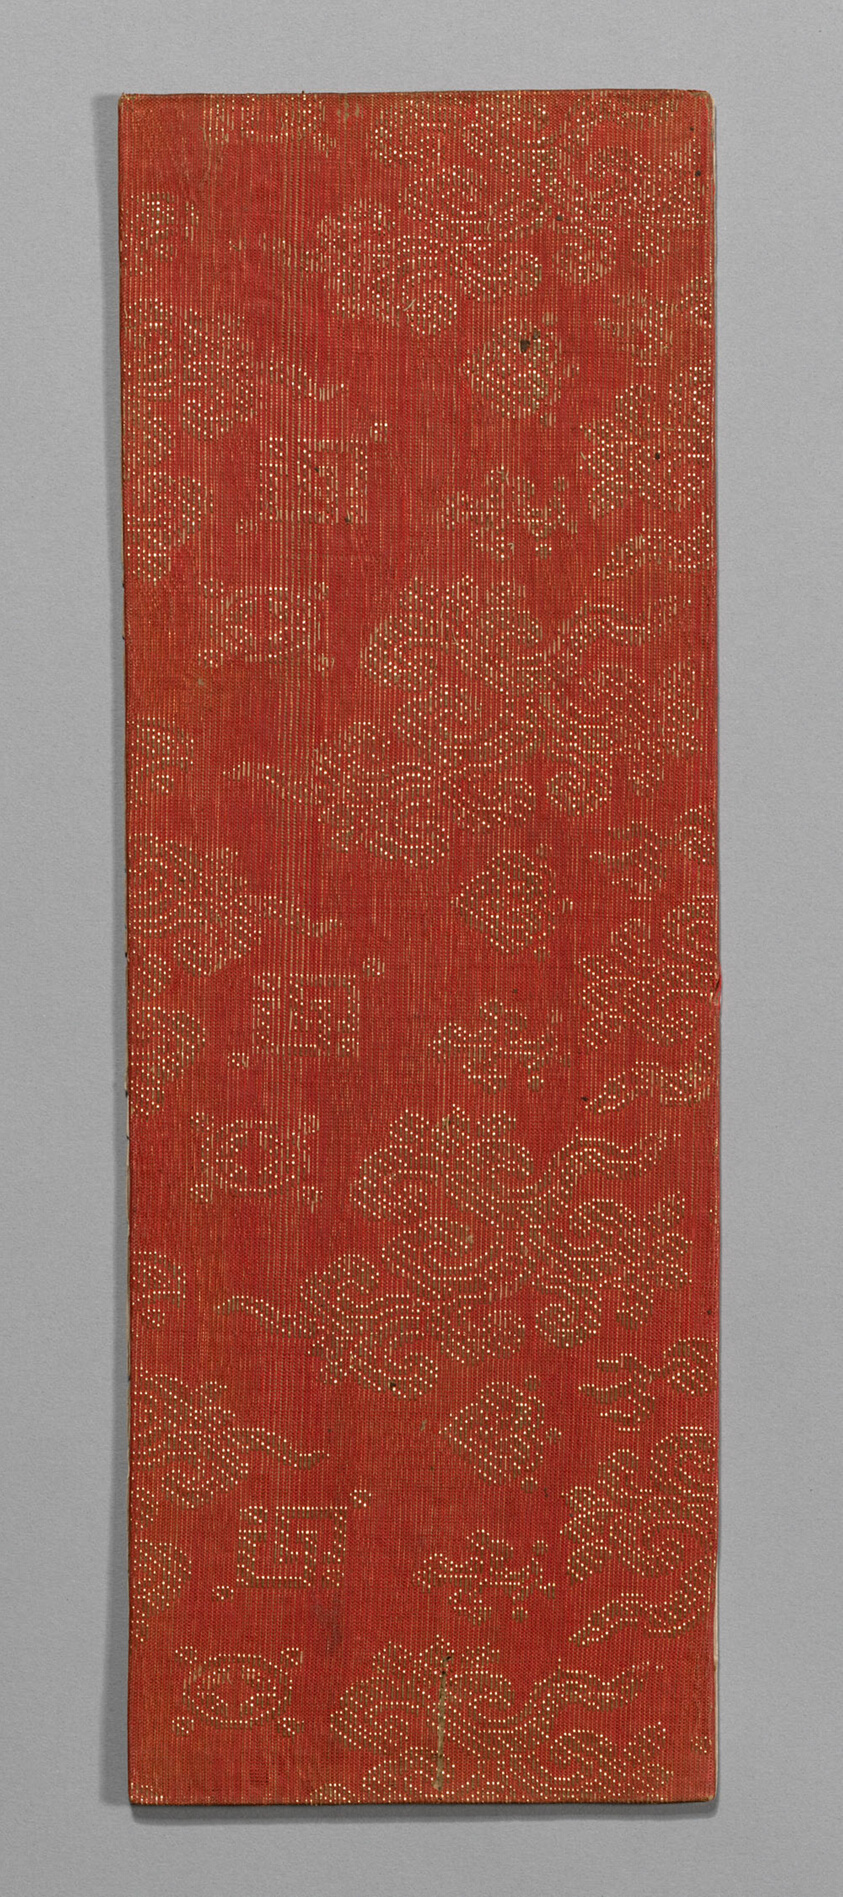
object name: Textile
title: Sutra Cover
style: ming, Chinese (culture or style), East Asian, asian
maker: China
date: Ming dynasty (1368–1644), c. 1590's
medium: Silk and gold-leaf-over-lacquered-paper strip, plain weave with supplementary patterning wefts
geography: China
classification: textile; weaving